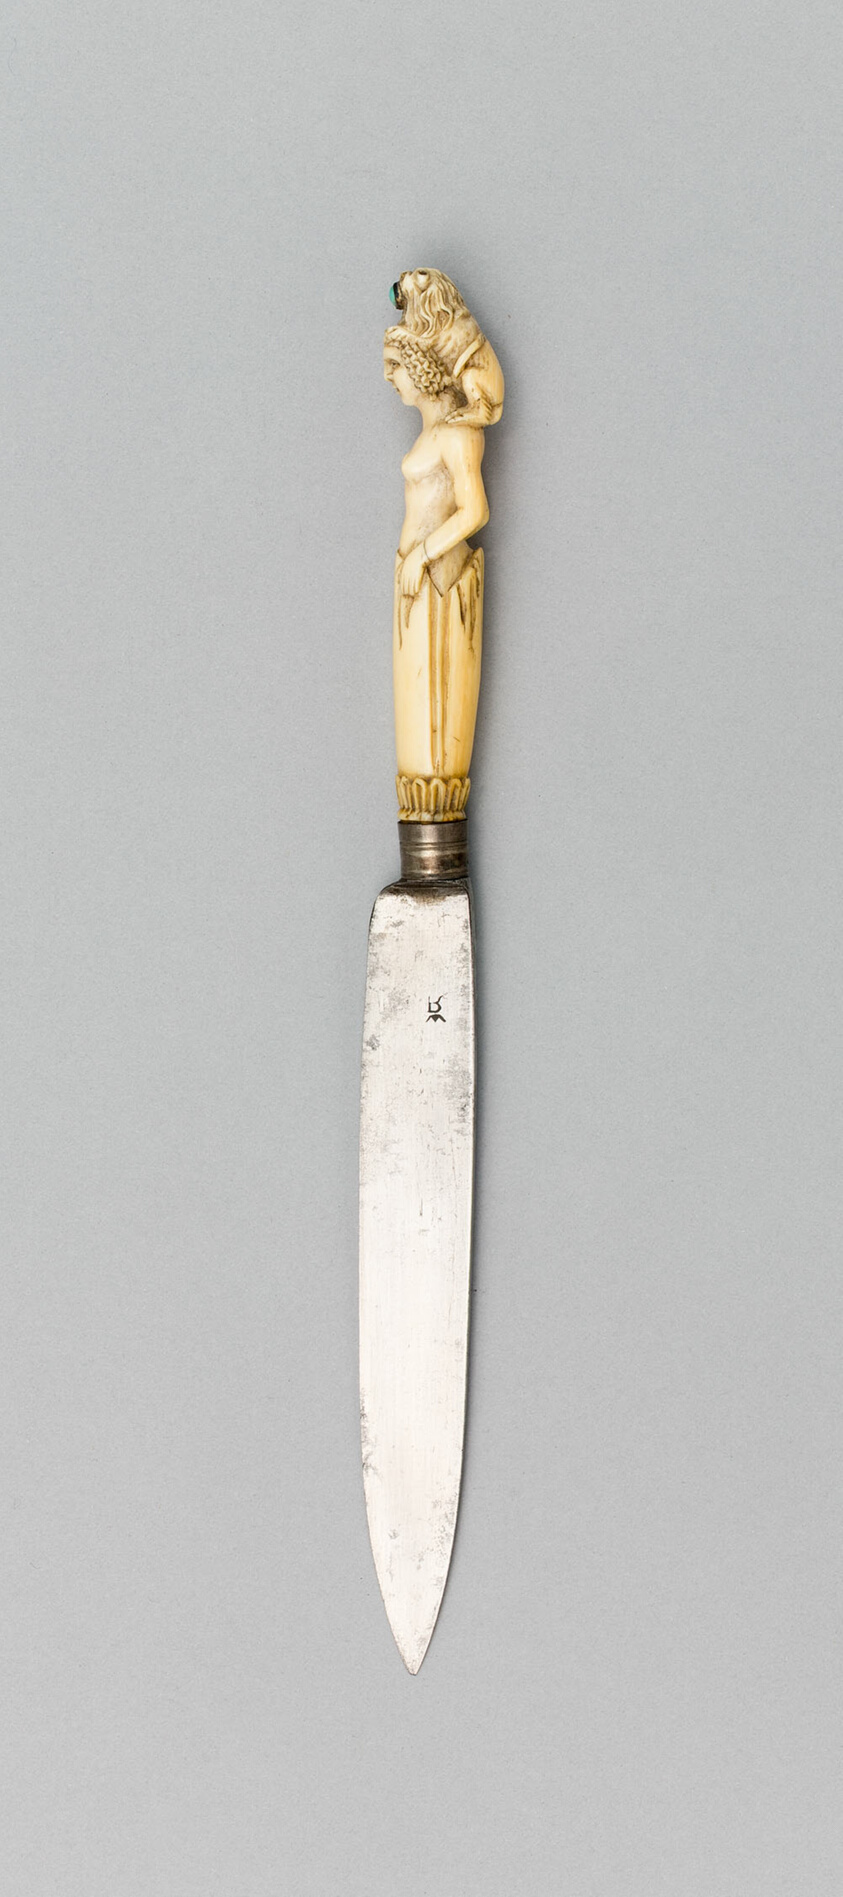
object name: Arms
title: Knife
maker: European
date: 19th century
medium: Steel, ivory(?), and bead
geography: Europe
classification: cutlery; arms and armor, miscellaneous; arms and armor; arms